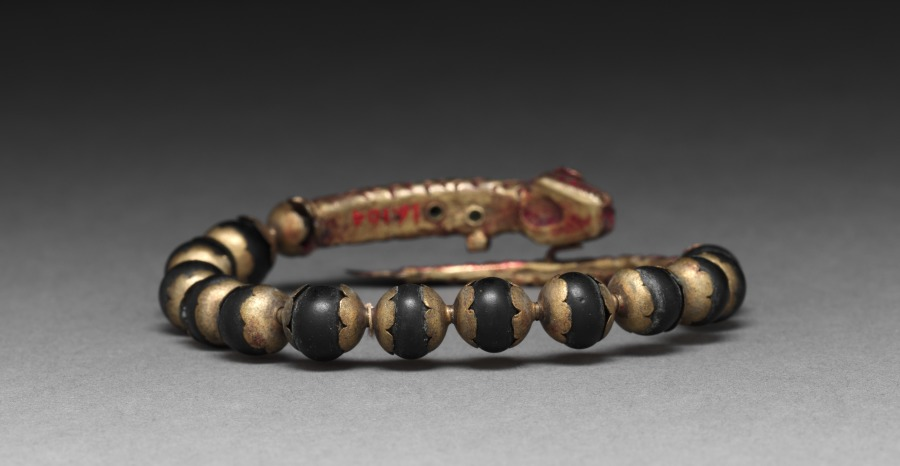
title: Bracelet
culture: Siam (?)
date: 1800s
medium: gold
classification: Jewelry